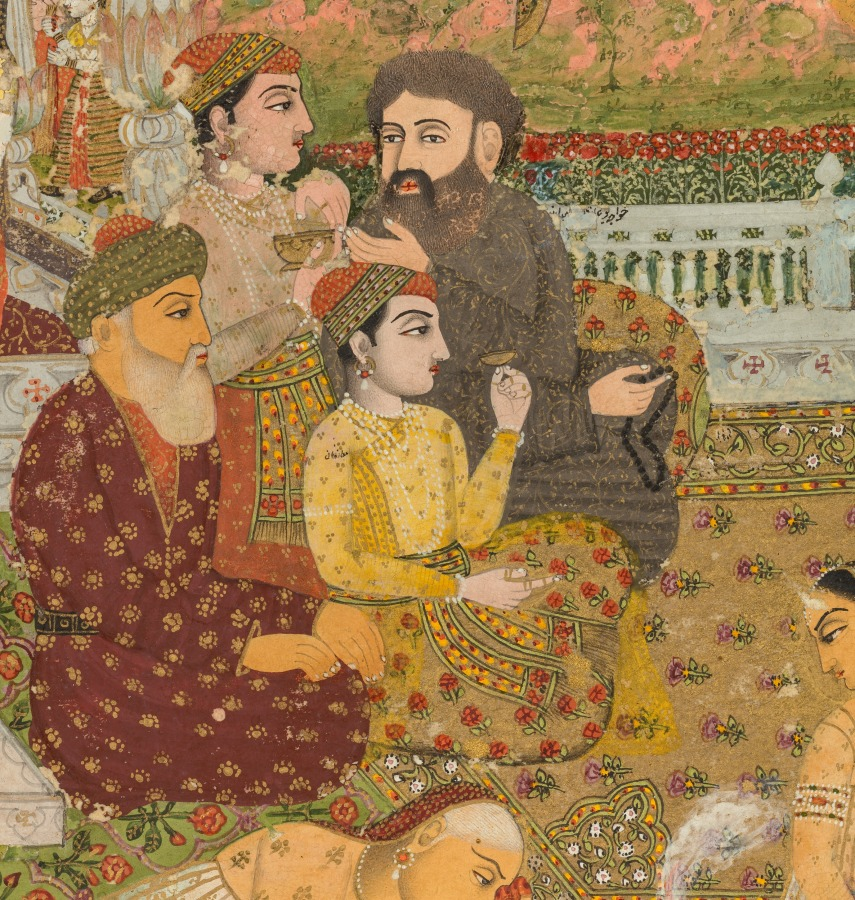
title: Lovers and beloveds: A composite of scenes from Persian, Urdu, and Sanskrit literature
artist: Chitarman II (Indian, c. 1680–с. 1750)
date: c. 1735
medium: Gum tempera and gold on paper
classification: Painting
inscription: Persian inscriptions throughout, in nasta‘liq script: Top left: The celebrated lover Ranjha; Top right, above awning: The notable ladies of the city falling into a swoon having caught sight of Joseph’s beauteous countenance; Top center, on pillar beneath canopy: The celebrated lover Vamiq; On another pillar, behind the woman’s head: The celebrated beloved ‘Azra; Upper left, on pillar: King Nala, the lover; Central figure with halo: The coming from the prison and sitting [in state] of the Lord Joseph the Prophet, with the women of the town cutting the palms of their hands and falling down unconscious; Left of center: [. . . cutting palms . . . wine cups fell from their hands . . . state of wonderment . . .]; Central pavilion at left: Sassi, the beloved the lover [Punnun]; Below central figure of Joseph: The stream of milk Shirin the beloved, weeping The death of Farhad, the lover; Lower right, in front of bearded man: Hafiz of Shiraz; Below his decanter: The stick of candy [referring to the woman with whom, according to popular lore, Hafiz was supposed to have fallen in love as a youth]; Behind the pavilion at right: Bride descending into a grave . . .; On the white railing to the left: Khwaja Bu Ali . . .; Bottom left: Queen Padmavati, the beloved, King Ratnasena, the lover; Bottom right: Majnun, the lover; On page held by Majnun: Say, “He is Allah, who is One, Allah the eternal refuge. He neither begets nor is born, Nor is there to Him any equivalent.” [Qur'an, chapter 112]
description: The figure of Joseph, identified by his halo, sits in the center near the top of this painting of heroes and heroines of ten different Persian, Urdu, and Sanskrit romances. The depicted scene occurs after Joseph has been purchased by Zulaykha in Egypt. Zulaykha, wishing to show him off to her friends and acquaintances, invites them to her home where she supplies oranges and knives. When the women see Joseph, they all are so distracted by his divine beauty that they accidentally cut their hands while peeling their oranges, but remain mesmerized by his appearance. The dramatic scene in the center is from the Persian romance of Khusrau and Shirin, in which Farhad, a stonecutter who loved Shirin, threw himself to his death from a mountaintop after hearing news of Shirin’s death, falsely sent to him from his rival Khusrau. The emaciated Majnun is in the lower right corner. Every vignette has been identified with a tiny Persian inscription.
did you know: Below the bearded poet Hafiz is the woman he loved; her name was Stick of Candy.